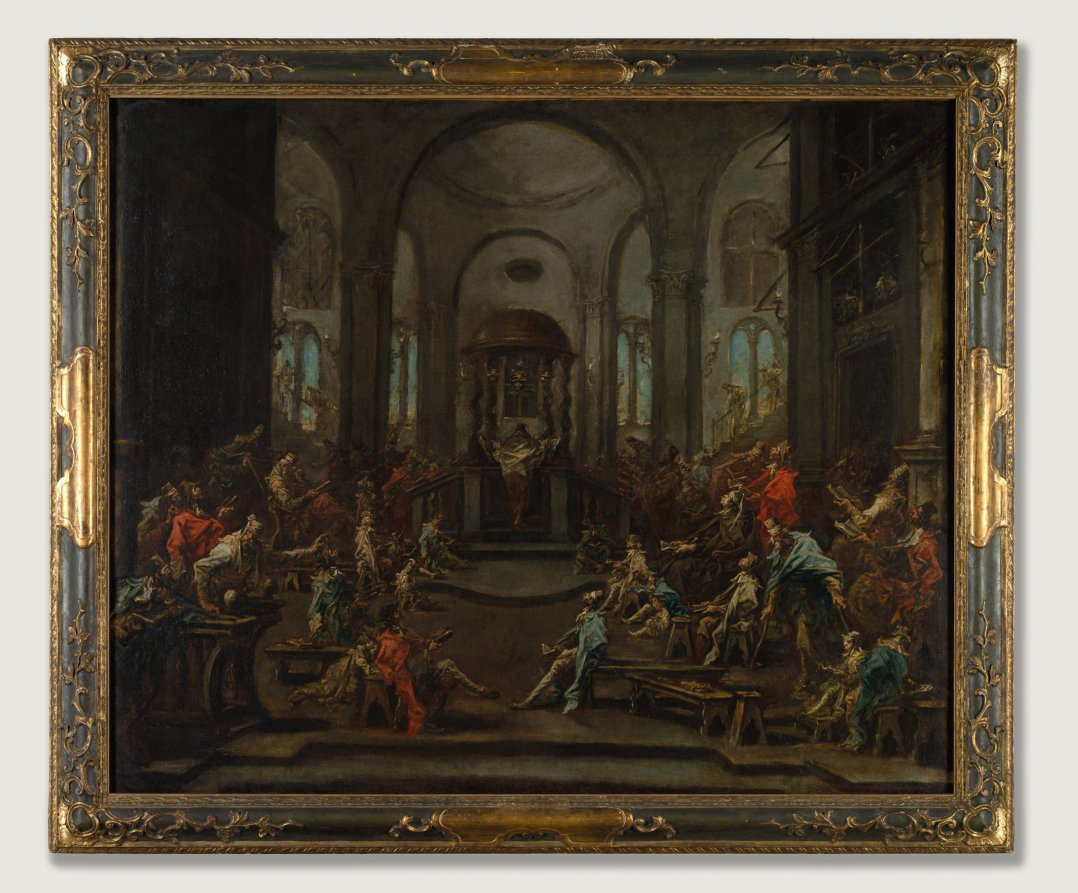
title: Interior of a Synagogue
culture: Italy, 18th century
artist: Alessandro Magnasco (Italian, 1667–1749)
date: c. 1725–35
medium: oil on canvas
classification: Painting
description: The Jewish synagogue was among Magnasco's most frequently painted subjects, here presented in a mystical and imaginative way. Expansive architectural space creates room for a multitude of tiny, fantastical figures with elongated limbs. These characters respond to the service with emotion and expressive gestures. Flashes of light dash across the surface against a dark, muted palette of earthy tones suggesting an otherworldly presence. The composition invites the viewer to enter the space and experience the service. Though he used characteristic elements of Baroque composition and was strongly influenced by Venetian painting, Magnasco's loose brushwork, elongated figures, and mysterious subject matter set him apart. Magnasco peers into a world of which he was not part: he was not Jewish and probably perceived Jews as outsiders. At the dawn of the Enlightenment in Europe progressive aristocratic families commissioned paintings by Magnasco, suggesting the painter's support for Enlightenment ideals which included religious tolerance, but Magnasco's personal views on Judaism in Italy remain unknown.